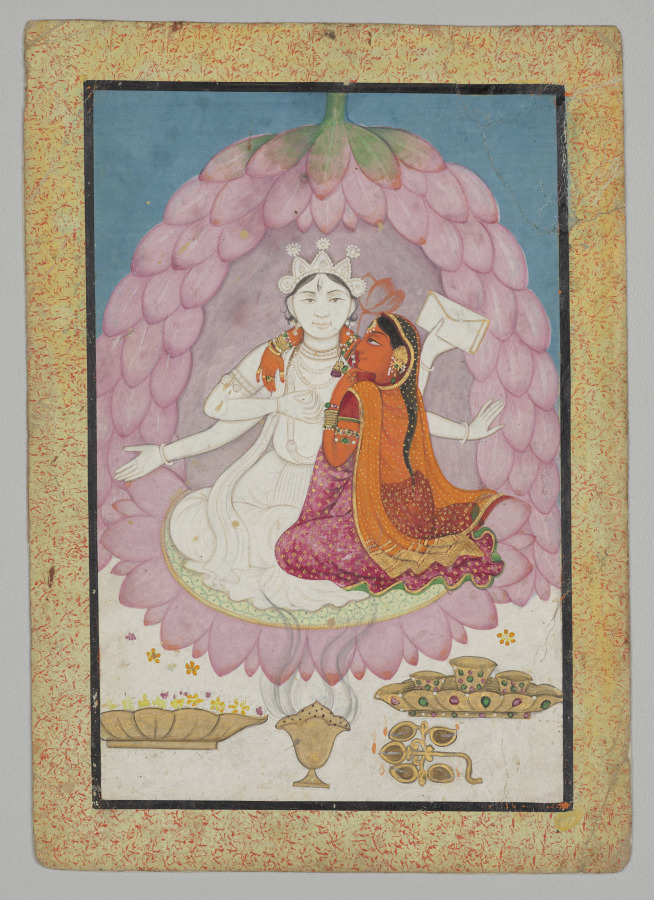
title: Divine couple seated in a lotus blossom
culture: Northern India, Pahari Region, Himachal Pradesh, Rajput Kingdom of Kangra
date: early 1800s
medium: Gum tempera and gold on paper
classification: Painting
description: A gigantic, thousand-petaled lotus flower provides an intimate setting for the lovers. They sit on the seed pod of another full-blown lotus flower, which indicates their transcendent nature by elevating them from the mire of the earth. Shown with full face forward in all white, the four-armed male deity has the all-seeing third eye in his brow and holds only a manuscript. The red goddess on his lap grasps a lotus flower in one hand, which communicates her benign and peaceful nature. At the bottom are offerings of flowers, incense, oil lamps, and jeweled cups of pure water or liquor.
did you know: The five-part butter lamp at the lower right is lit with flames, and smoke wafts from the censer.